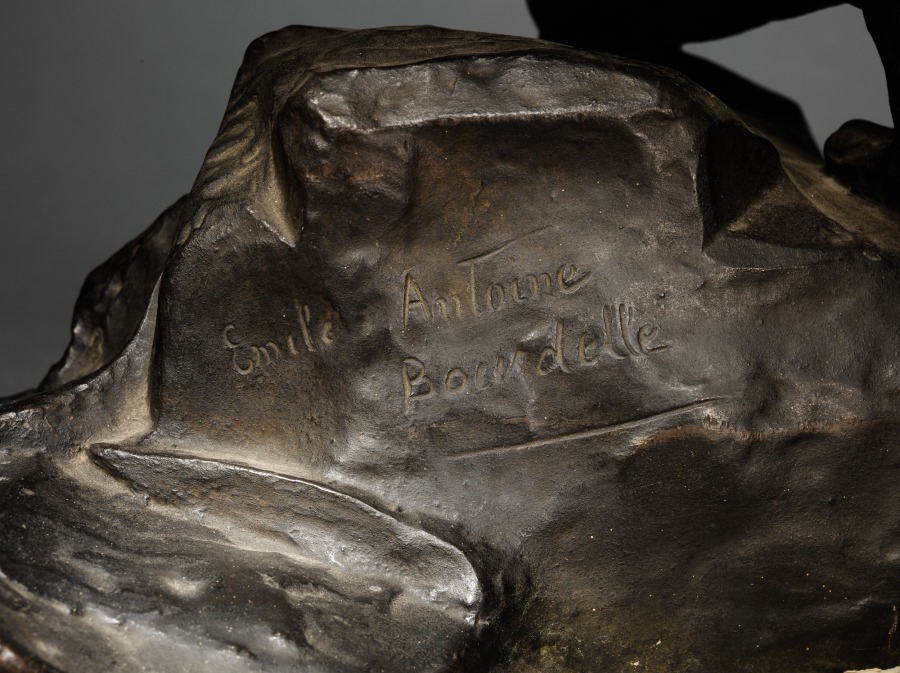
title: Herakles the Archer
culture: France, 19th century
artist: Emile Antoine Bourdelle (French, 1861–1929)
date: 1908–9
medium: bronze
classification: Sculpture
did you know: The model who posed for this sculpture was Major Paul Gustave André Doyen-Parigot, an accomplished sportsman and military commander, who was later killed during World War I in the Battle of Verdun.